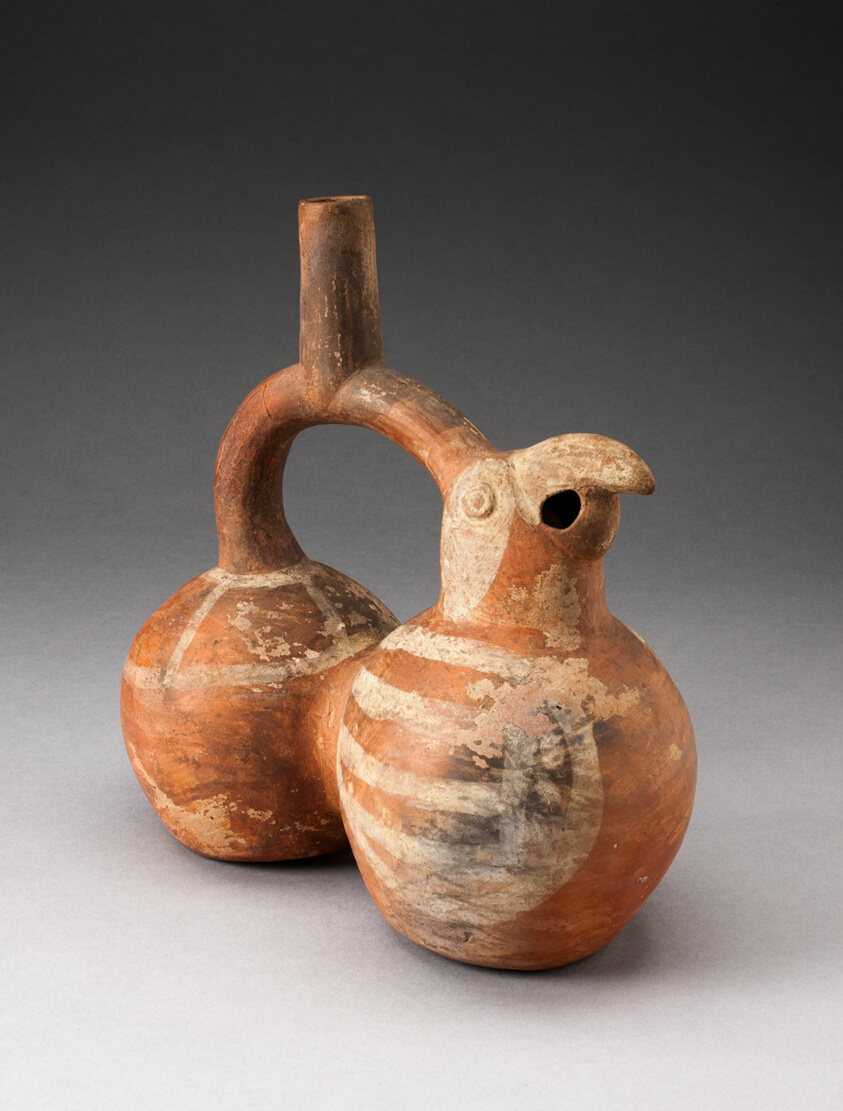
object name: Vessel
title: Double-Chambered Stirrup Spout Vessel in Form of a Parrot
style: moche, Arts of the Americas, andes, south american, andean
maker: Moche (North coast, Peru)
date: 100 BCE–500 CE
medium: Ceramic and pigment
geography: Peruvian North Coast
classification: earthenware; ceramics; vessel; art of the americas